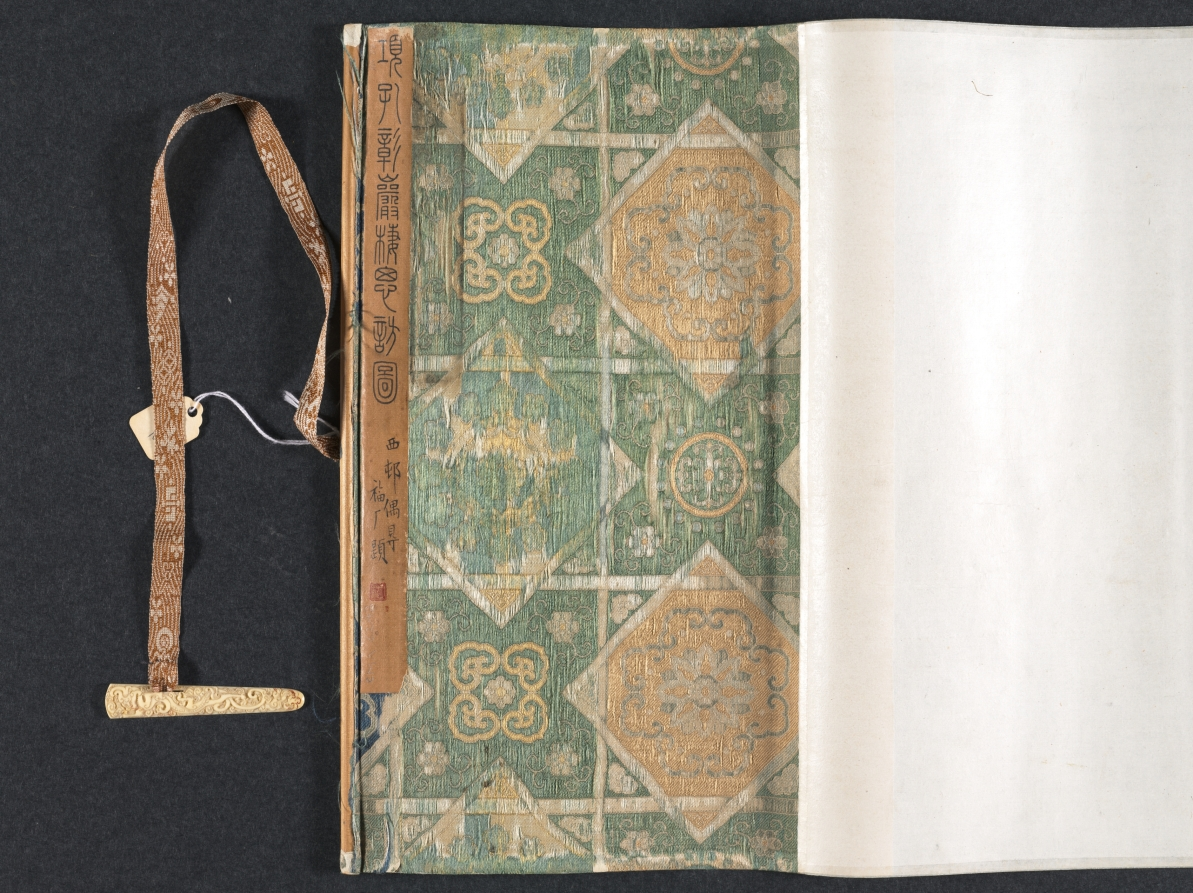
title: Meditative Visit to a Mountain Retreat: In Picture and in Words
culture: China, Ming dynasty (1368–1644)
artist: Xiang Shengmo (Chinese, 1597–1658)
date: 1648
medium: handscroll; ink on paper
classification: Painting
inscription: Artist's title and 3 seals (in front of painting): [title] Meditative Visit to a Mountain Retreat: In Picture and in Words 巖栖思訪圖詠 [3 seals] Tian lai ge zhong wen sun 天籟閣中文孫; Xiang shi kong zhang zui xin han mo 項氏孔彰醉心翰墨; Qing fu yuan zhong di yi miao ye 清福緣中第一妙業.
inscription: [印] 兔烏叟; 考古正今. 觀斯人兮何逍遙，非逍遙兮思其友。 思其友兮天一方，欲一訪之難回首。 松耶柏耶稱後凋，巖穴霏微何二酉。 山兮水兮人悠悠，遠莫致之神交否？ 河關一向望不及，言笑于今更非偶。 問游魚兮樂何深？問飛鳥兮歸何藪？ 問猿鶴兮何親疎？問鹿豕兮何夭壽？ 問白雲兮從何來？問流泉兮向何走？ 問漁樵兮何江山？問草木兮何畝畎？ 問春秋兮何炎涼？問世人兮何長久？ 問日月兮何晦明？曾見當時烏兔叟？ 戊子嘉平之初偶作此圖并題。 胥樵項聖謩識。 [印] 兔烏叟; 項氏孔彰; 未喪斯文.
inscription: 13 additional seals: 4 of Tang Zuomei 唐作梅 (late 18th–19th century); 3 of Zhang Baixi 張百熙 (1847–1907); 4 of Zhang Heng 張珩 (1915–1963); 2 unidentified.